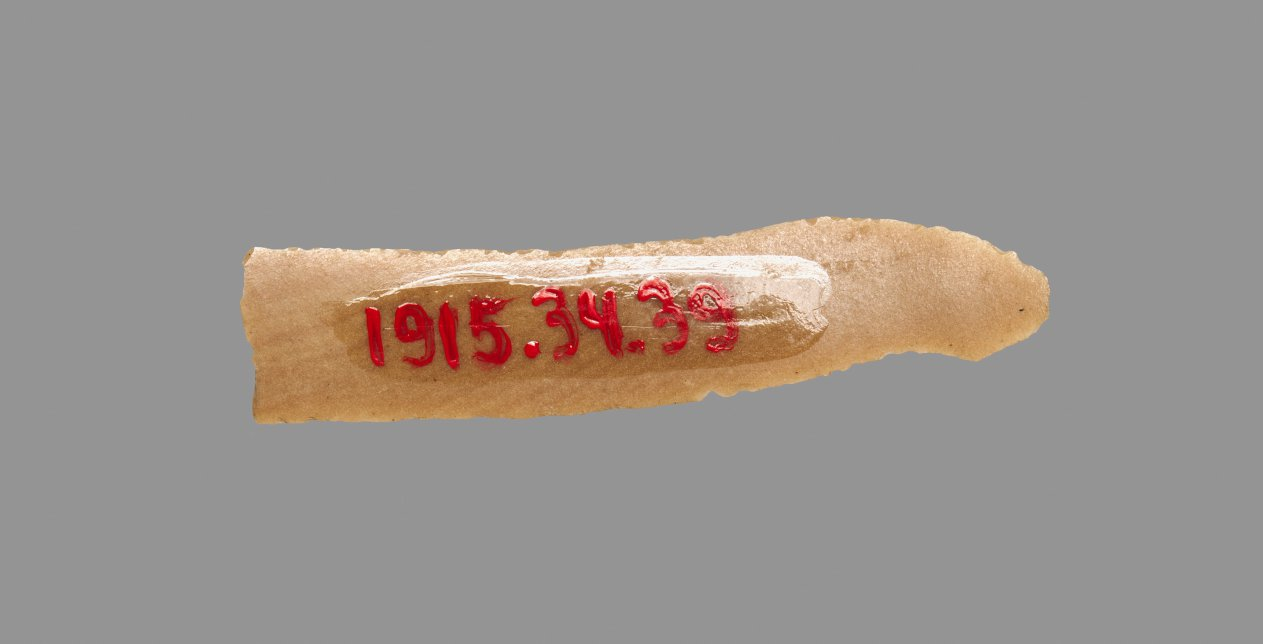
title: Sickle Blade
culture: Egypt, Middle Kingdom (2040–1648 BCE), Dynasty 12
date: 1980–1801 BCE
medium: flint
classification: Implements